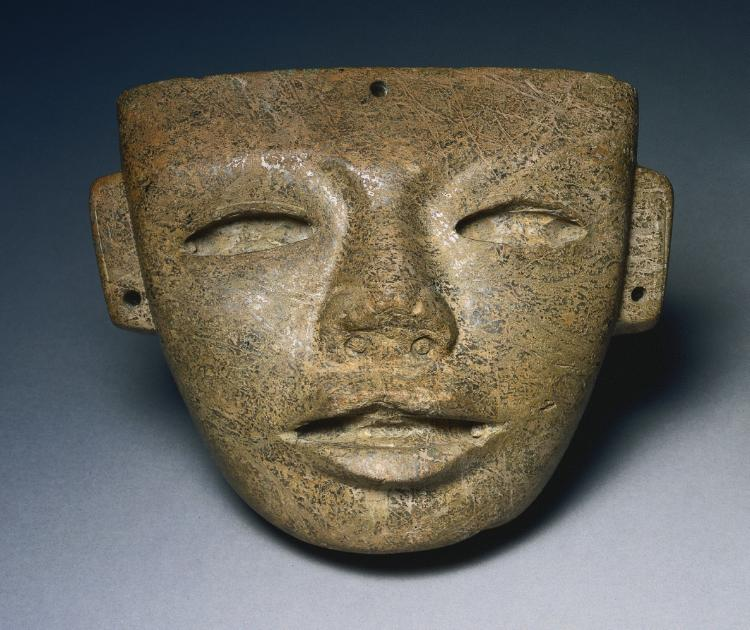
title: Mask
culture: Central Mexico, Teotihuacán, Classic period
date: 1–550 CE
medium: greenstone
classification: Stone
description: Many Teotihuacán masks were once tied to something via holes on the back--perhaps a body-shaped form dressed in garments, ornaments, and a headdress that identified the figure. The stone masks’ eyes and mouths once held inlays representing irises, pupils, and teeth.